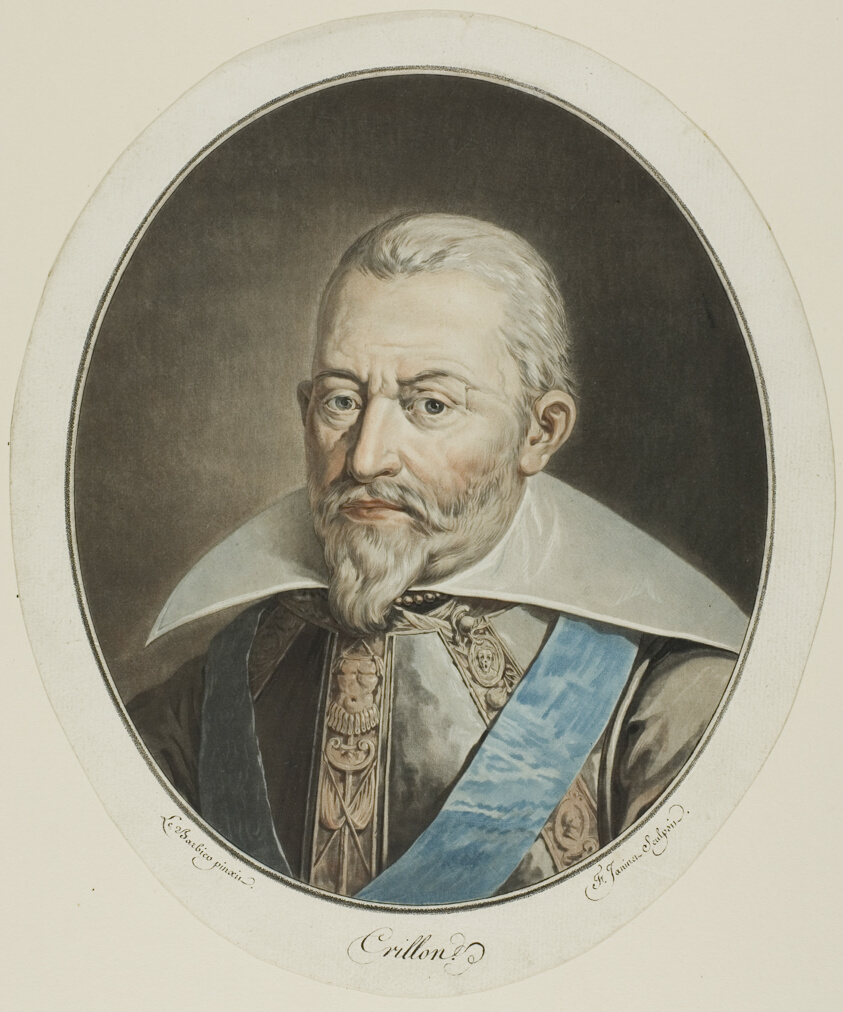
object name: Print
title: Crillon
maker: Jean-François Janinet; French, 1752-1814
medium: Aquatint etching on paper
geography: France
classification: aquatint; print; prints and drawing